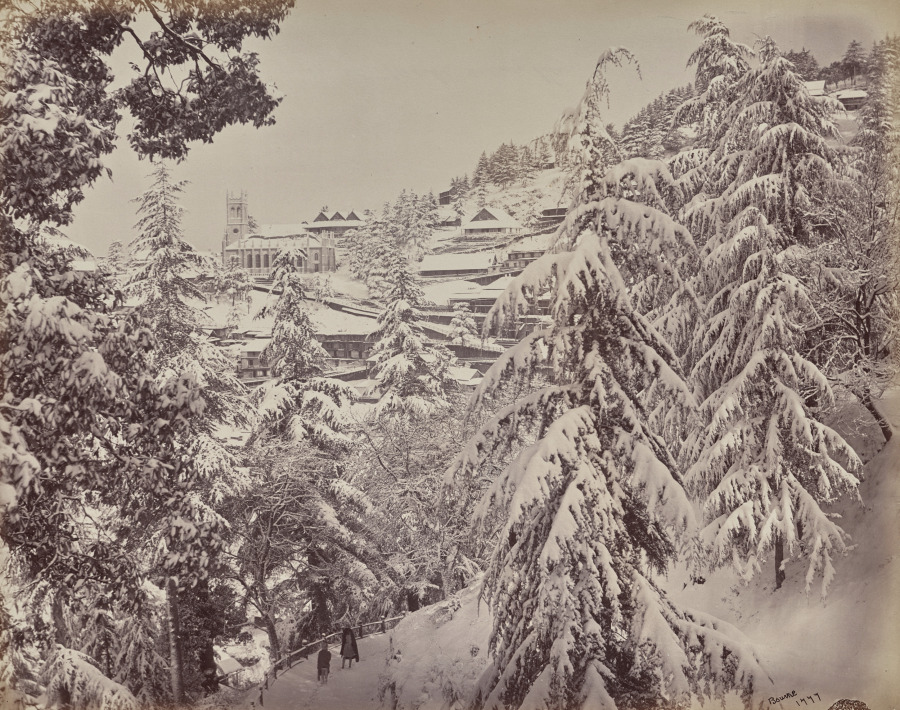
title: Shimla. View of the Church from Mount Jakko Looking West with Part of the Mall in Winter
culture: England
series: Photographs of Northern India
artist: Samuel Bourne (British, 1834–1912)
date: 1863–70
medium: albumen print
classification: Photograph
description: The 50 images in this album, all taken in the 1860s, move from the hill towns of the Himalayas down to cities including Lahore (now in Pakistan), Delhi, Lucknow, Agra, Benares (now Varansi), and Calcutta (now Kolkata). Architectural studies of major monuments offer valuable historical records of what sites such as the Taj Mahal and the imperial mosque of the Mughal emperors in Delhi looked like before 20th-century restorations.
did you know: Samuel Bourne, the author of most the images in this album, was a banker in England before he moved to India to become a professional photographer.